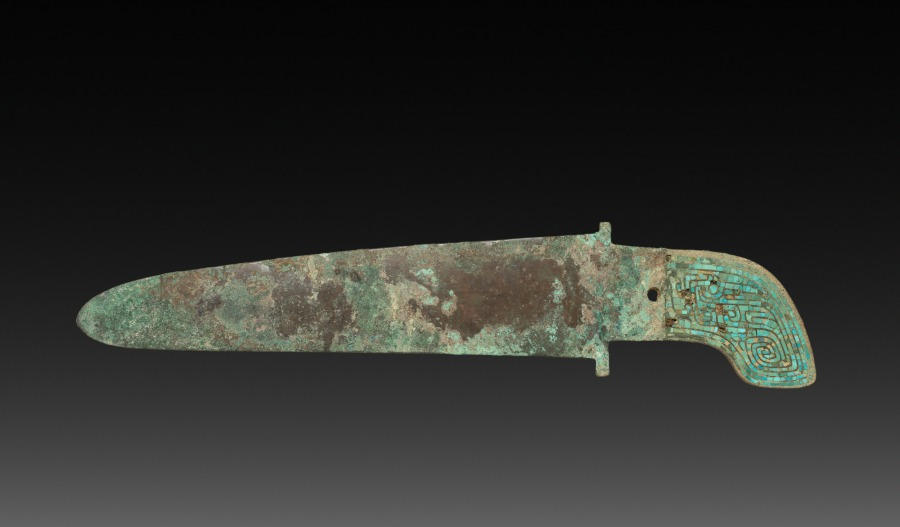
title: Ge (Dagger-Axe)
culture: China, Shang dynasty (c. 1600–c. 1046 BCE)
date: c. 1600–1050 BCE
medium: bronze, inlaid with turquoise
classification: Metalwork